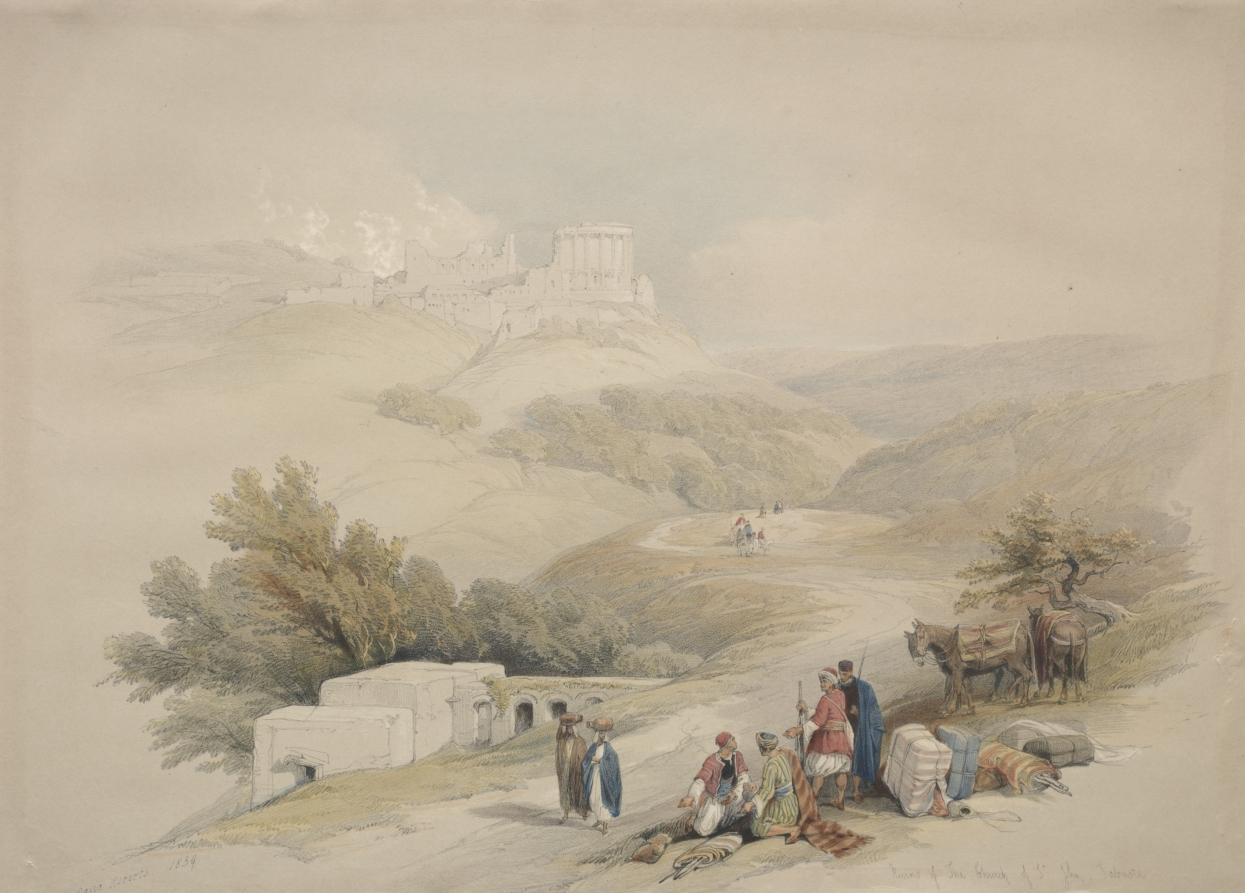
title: Ruins of the Church of St. John Sabaste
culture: England, 19th century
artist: David Roberts (Scottish, 1796–1864)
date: 1839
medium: color lithograph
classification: Print